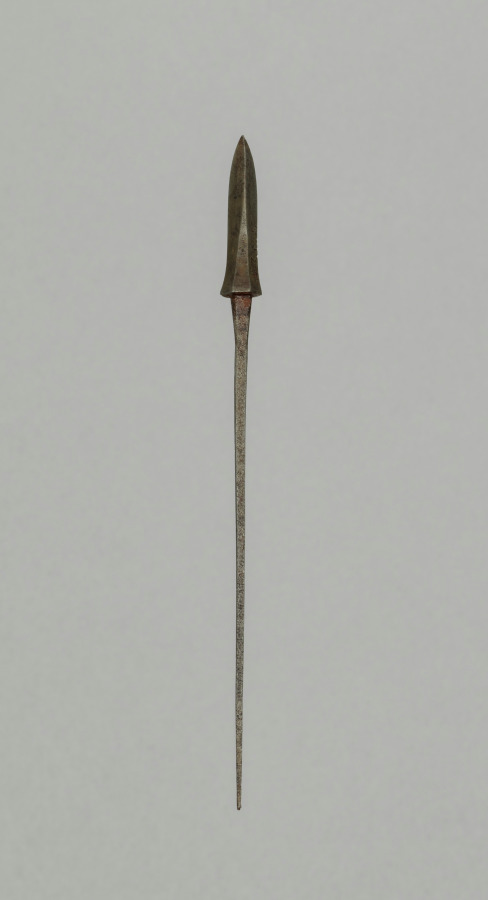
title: Arrow Point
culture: Japan, Edo period (1615–1868)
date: 1700s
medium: steel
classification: Arms and Armor